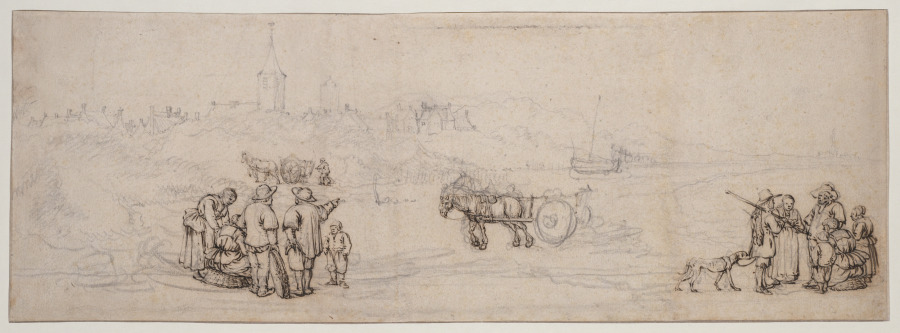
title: Dune Scene with Peasant Figures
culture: Netherlands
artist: Willem van de Velde (Dutch, c. 1611–1693)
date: mid-1650s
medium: pen and brown ink over graphite on antique laid paper; lined with tissue paper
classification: Drawing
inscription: On verso, left border in graphite: Strant fil (?)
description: Starting life as a sailor, Willem van de Velde was soon appointed to make drawings and paintings of ships in the Dutch navy, and, in 1672, he was appointed by the English king to record English vessels and naval campaigns. In this drawing, made across two oblong sheets of a sketchbook, Van de Velde turned his eye to the beach, using chalk to capture the flat beach, grassy dunes, and small village and church steeple on the coast of Holland. He added the groupings of figures and horse-drawn carts in the foreground later with pen and ink.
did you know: This artist started his career as a sailor, but when his talent was recognized, he became a draftsman and painter of naval scenes and battles in both Holland and England.